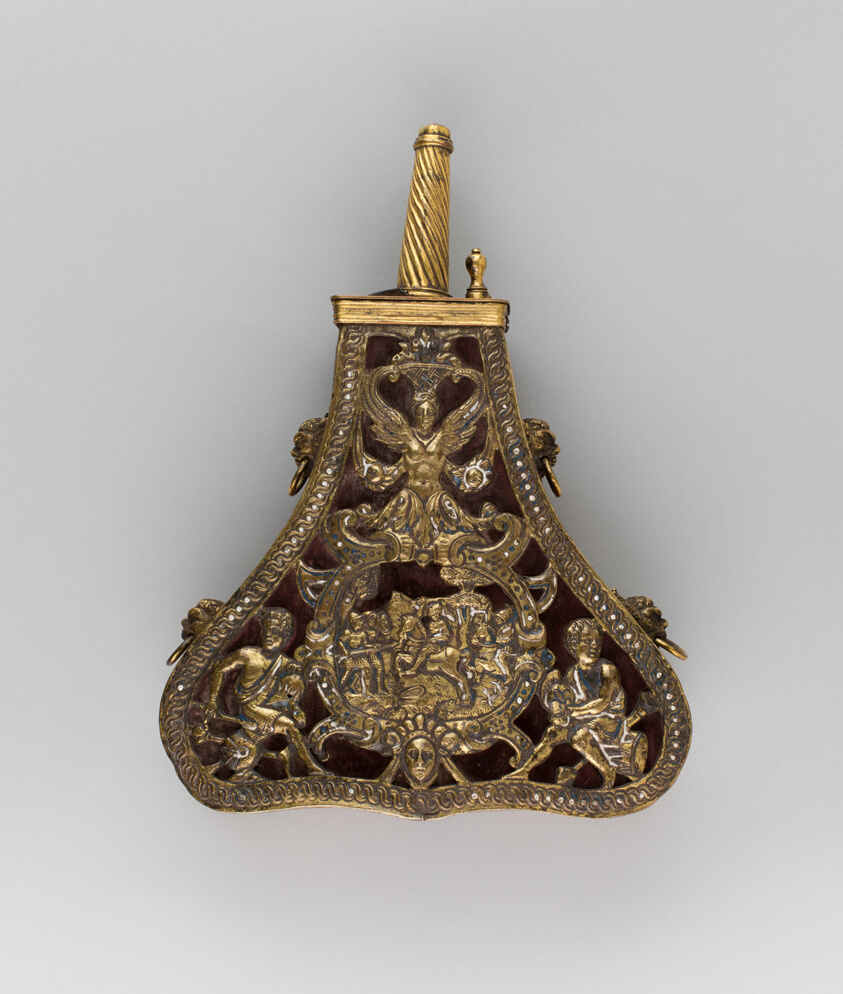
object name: Arms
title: Powder Flask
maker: Italian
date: 1590 with later addtions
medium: Wood, red velvet, brass, and enamel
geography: Italy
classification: firearm-accessory; arms; arms and armor